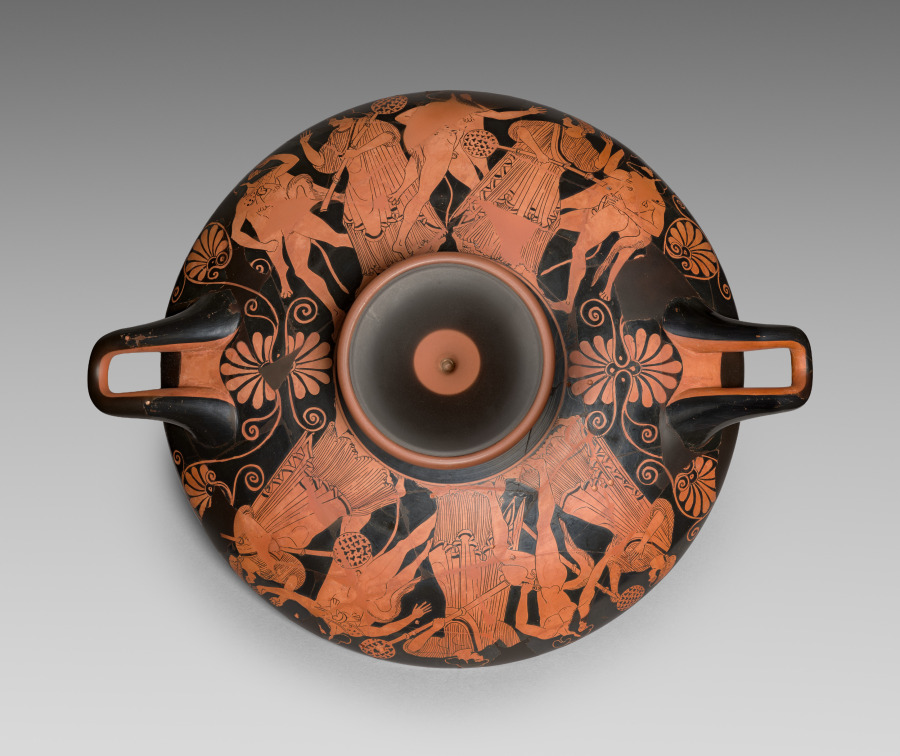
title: Red-Figure Kylix (Drinking Cup): Dionysos and Satyr (I); Satyrs and Maenads (A, B)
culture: Greece, Athens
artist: attributed to Douris (Greek, Attic, active c. 500–470 BCE)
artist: or Painter of London E 55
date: c. 480 BCE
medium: ceramic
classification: Ceramic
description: Reconstructed from 72 fragments, this cup has been repaired several times, indicating its enduring value to owners. Pairs of holes straddling cracks once held ancient wire or clamp repairs. Numerous incomplete holes may signify recent interventions. Early modern efforts to hide cracks and certain features of the satyrs that could have offended sensibilities of the time also masked the original artistry of its painting. So, for many years the cup languished in storage. Cleaning and reconstruction in 1952–53 revealed enough to allow attribution to a respected vase painter, Douris, reviving the cup’s reputation. More recently, a different attribution has been suggested, and a new conservation campaign replaced ancient parts from a different cup with modern reconstructions more like those lost.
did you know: In the tondo, a dancing satyr approaches the wine god Dionysos, who holds a kantharos and grapevine.